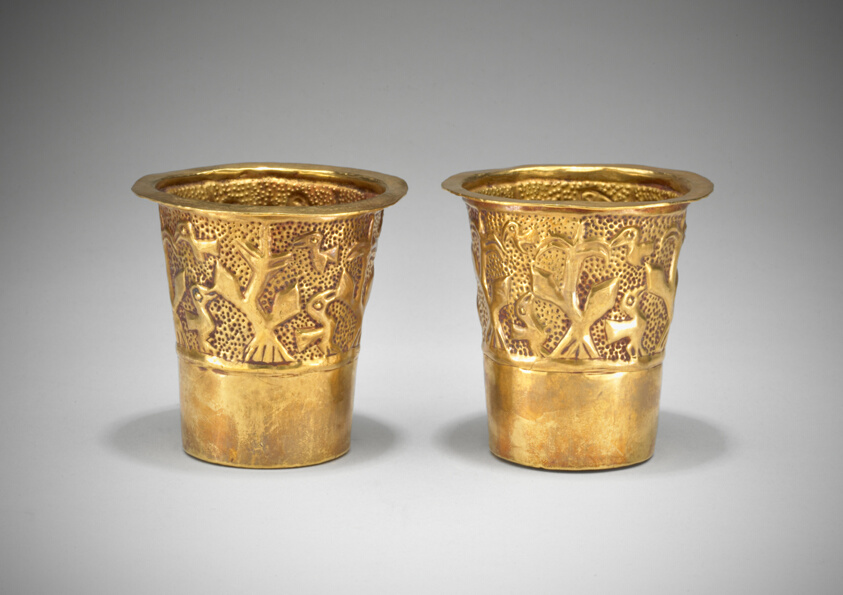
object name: Vessel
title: Pair of Beakers Depicting Birds in a Cornfield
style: inca, americas, andes, Arts of the Americas, andean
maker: Inca (Ica Valley, south coast, Peru)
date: 1100–1438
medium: Gold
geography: Ica Valley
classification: drinking vessel; gold; art of the americas; vessel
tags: landscapes, agriculture, animals, birds, offering, ritual objects